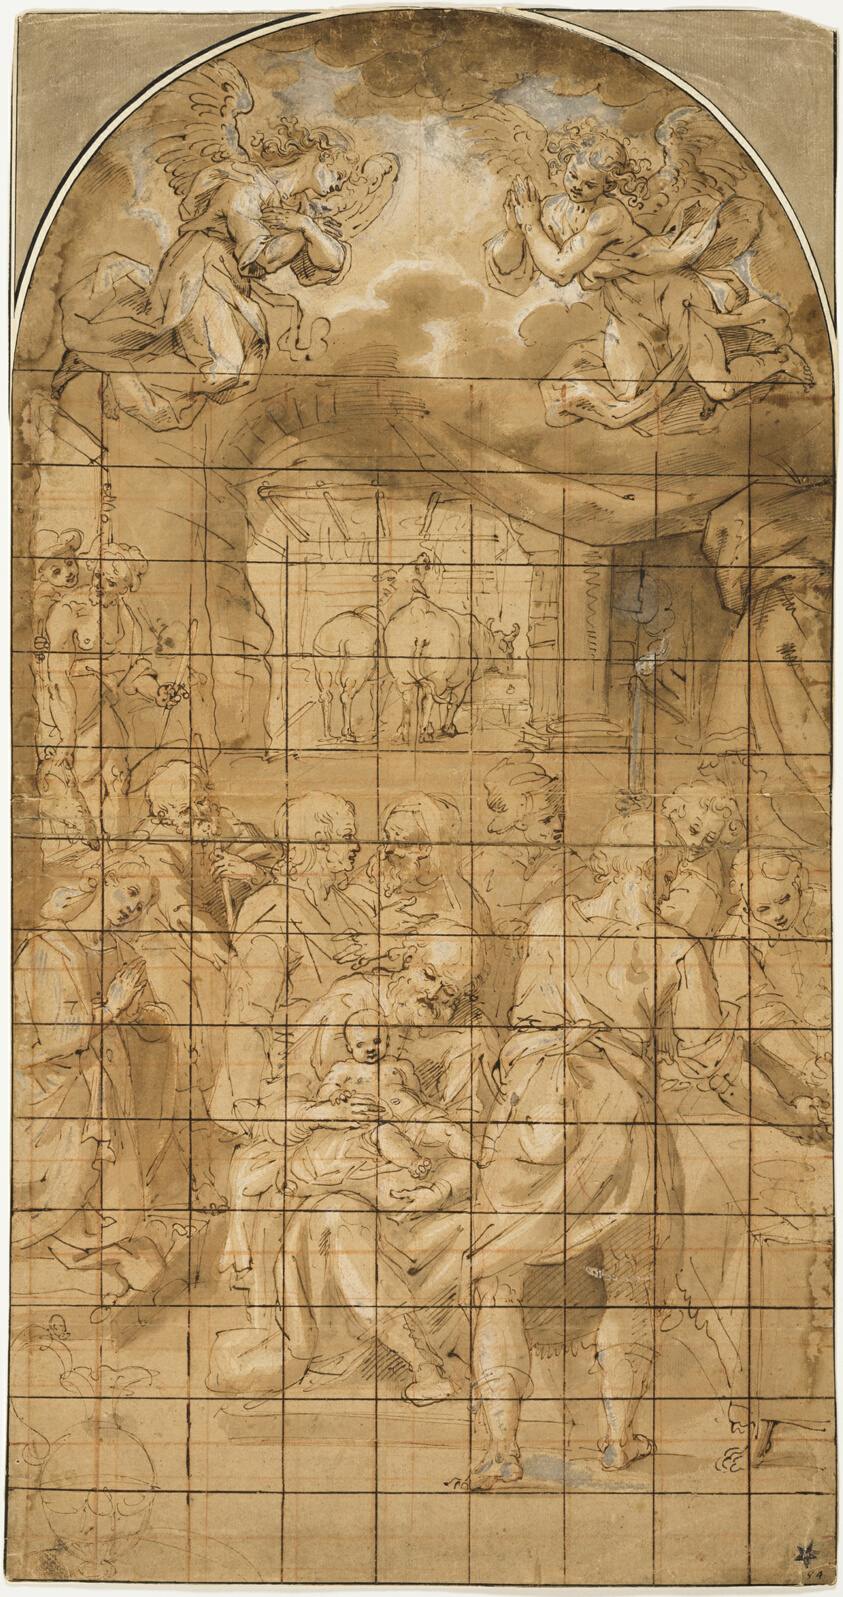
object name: Drawing and Watercolor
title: Adoration of the Christ Child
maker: Filippo Bellini or circle of; Italian, c. 1550-1603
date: 1580/1600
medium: Pen and brown ink with brush and brown wash, heightened with lead white (partly oxidized), over traces of red chalk, on lunette-shaped tan laid paper, squared in red chalk and pen and brown ink, laid down on ivory laid card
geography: Italy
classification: pen and ink drawings; drawings (visual works); prints and drawing